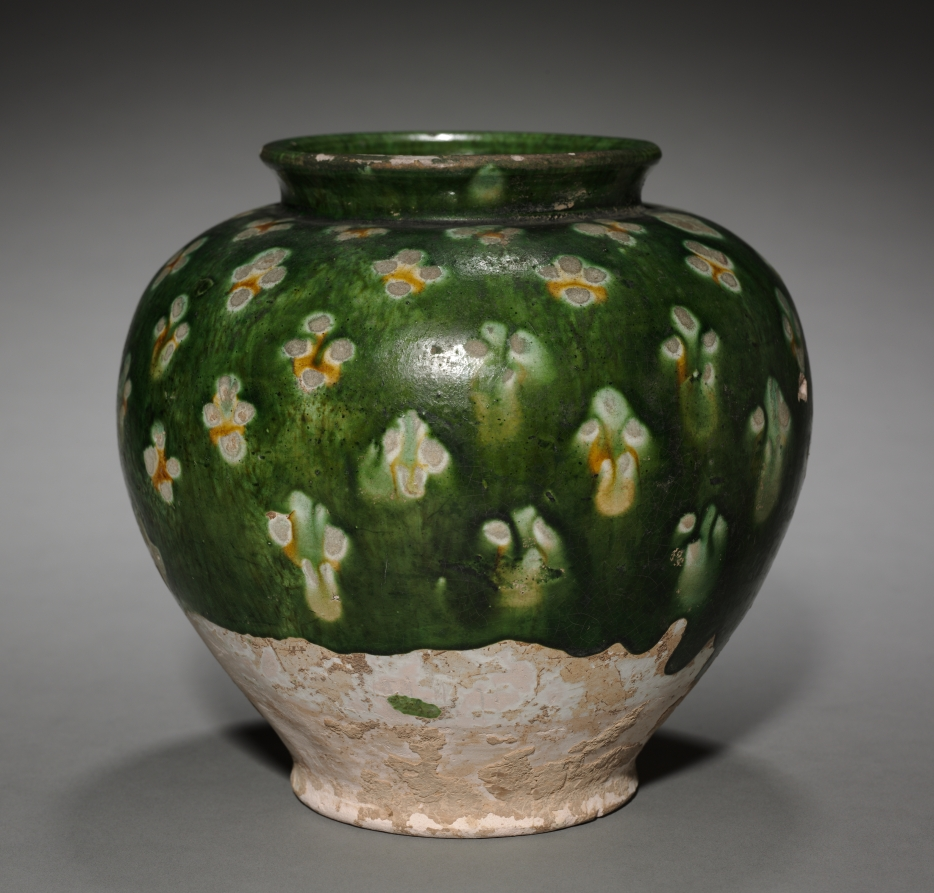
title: Jar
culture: China, Tang dynasty (618-907)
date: late 600s–700s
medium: glazed pinkish-buff earthenware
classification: Ceramic